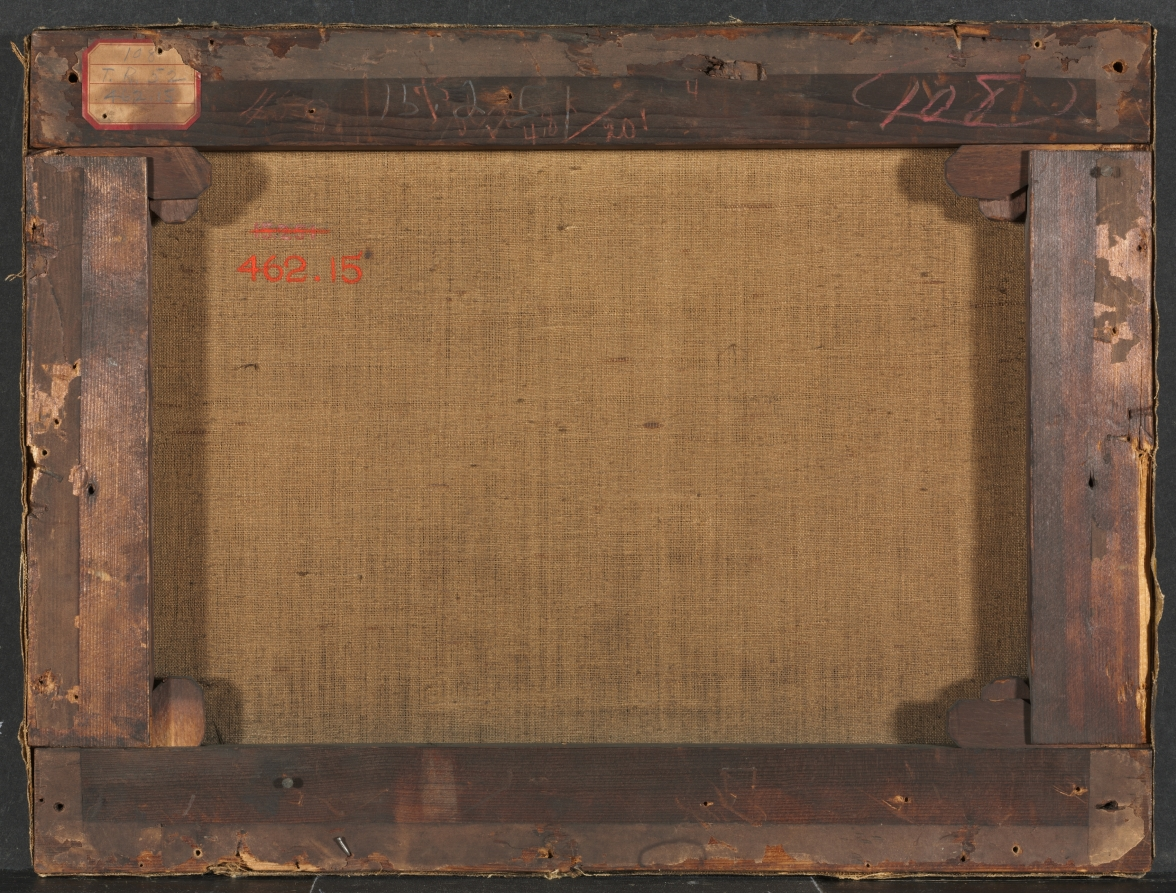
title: View of the Village of Eemnes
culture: Netherlands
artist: Jordanus Hoorn (Dutch, 1753–1833)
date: 1778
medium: oil on canvas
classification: Painting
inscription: Signed on wooden fence in lower right: J.: Hoorn. fi/ 1778